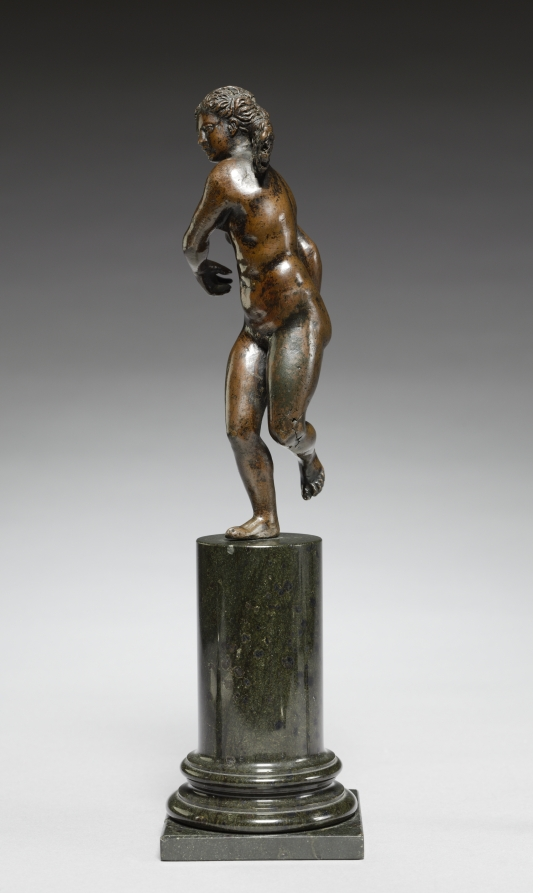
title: Thetis Running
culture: Italy, Ravenna, 16th century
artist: workshop of Severo da Ravenna (Italian, c.1496–c.1543)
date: c. 1527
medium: bronze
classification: Sculpture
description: The complex, corkscrew-like twist of the figure’s body around a central axis indicates that this work was meant to be seen and admired in the round. Producing a sculpture of a body in motion posed a challenge for Renaissance artists, and complex compositions like this were often adapted from prints and paintings. The pose of this bronze statuette may have been inspired by a print representing the Greek sea goddess Thetis. Thetis was courted by the gods Zeus (Jupiter) and Poseidon (Neptune), but was eventually married to the mortal Peleus; the Greek hero Achilles was their son. In the print, Thetis pours water from a jug held at her hip and her upraised foot rests on a large shell, both referencing her role as sea goddess. The statuette’s lack of identifying attributes encourages the viewer to focus instead on the figure’s graceful spiraling form, and the sculptor’s skill in creating a convincing sense of movement.